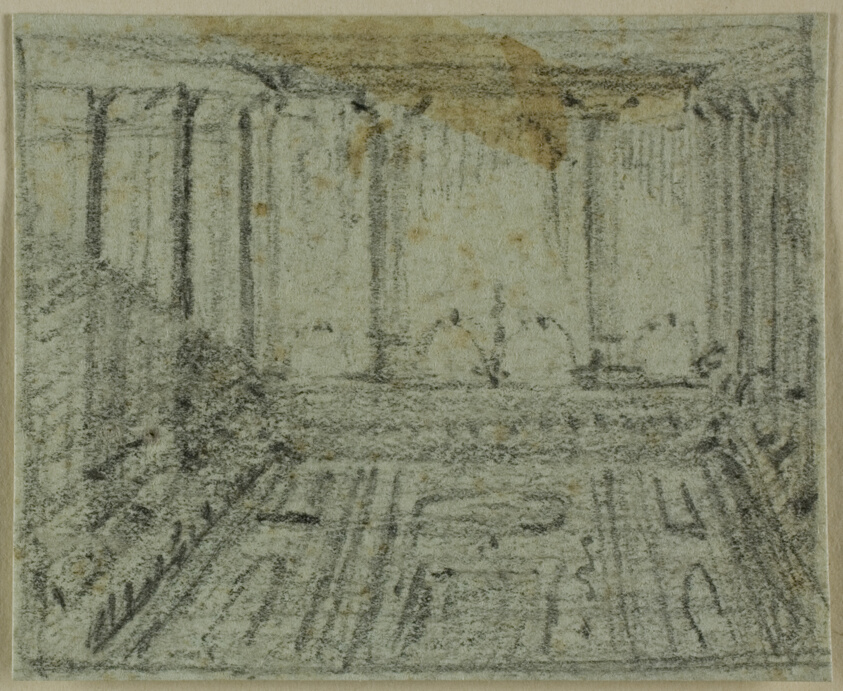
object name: Drawing and Watercolor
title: Portico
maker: Domenico Quaglio II; German, 1787-1837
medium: Graphite, on blue laid paper, tipped onto cream wove paper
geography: Germany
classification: graphite; drawings (visual works); prints and drawing